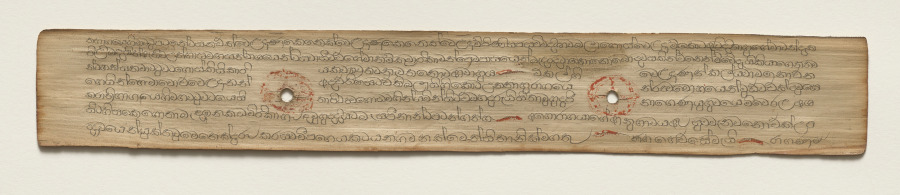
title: Leaf from a Buddhist Manuscript (verso)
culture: Sri Lanka, Singhalese, Late 17th century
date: c. 1700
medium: fiber paper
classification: Manuscript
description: Palm leaf material is still used for manuscripts in Sri Lanka. The palm leaves are prepared first by boiling them, drying them in the sun, and then rubbing them with oils. Scribes then use a metal stylus to incise the text. Then charcoal powder is wiped across the pages, filling in only the inscribed lines.